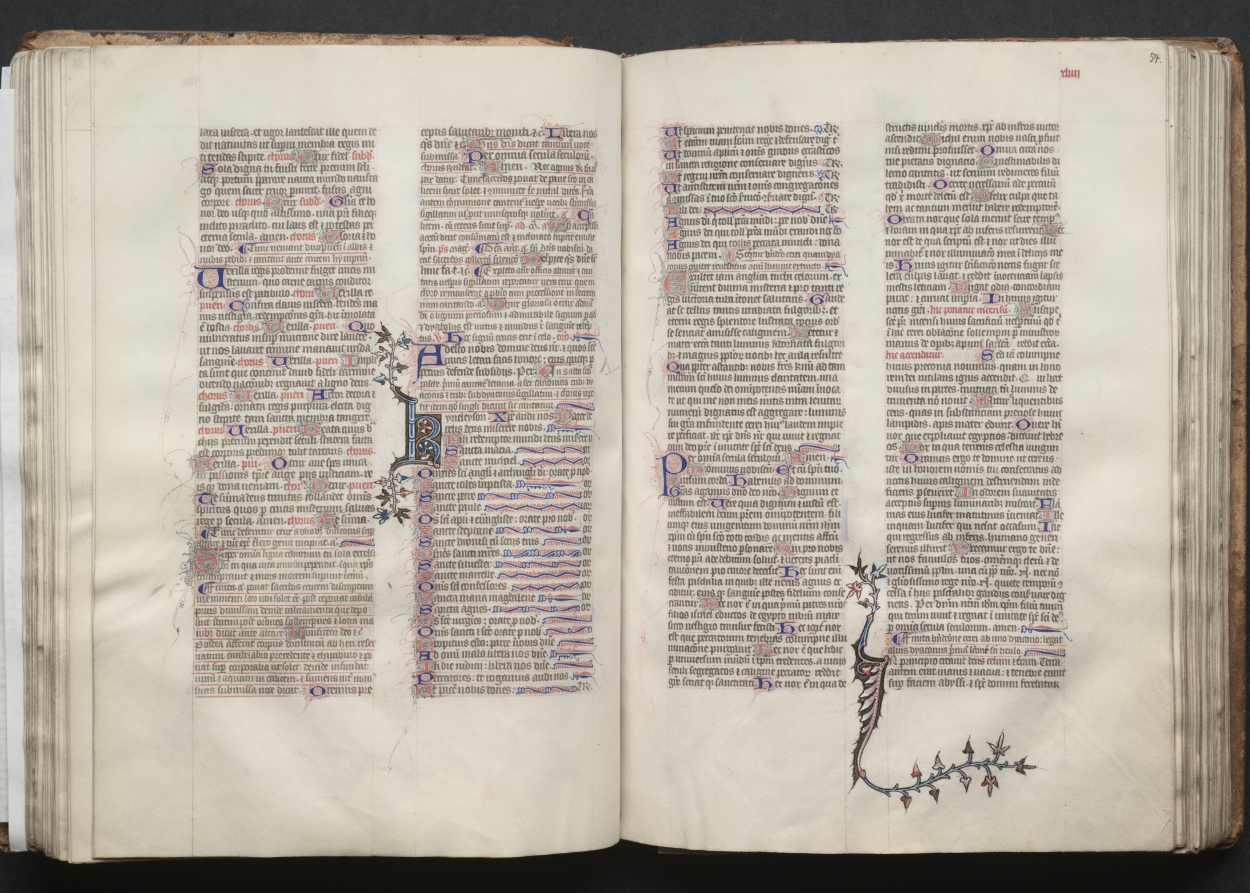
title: The Gotha Missal: Fol. 53v, Text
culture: France, Paris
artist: Master of the Boqueteaux (French)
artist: and Workshop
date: c. 1375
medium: ink, tempera, and gold on vellum; blind-tooled leather binding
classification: Bound Volume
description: The style and quality of this manuscript's decoration is typical of deluxe Parisian books made for aristocratic or royal patrons. Most of the book's decoration appears to be the work of the Master of the Boqueteaux, an artist active at the court of King Charles V (died 1380). His style was apparently shared by a number of book illuminators working in and around Paris. It is very possible that the Gotha Missal belonged to Charles V, but is not provable because the manuscript has no royal portraits and lacks a colophon. Given the book's magnificent decoration, however, it would seem that it was produced for a Valois prince, if not for the king himself. The manuscript receives its name from the German dukes of Gotha, its later owners.